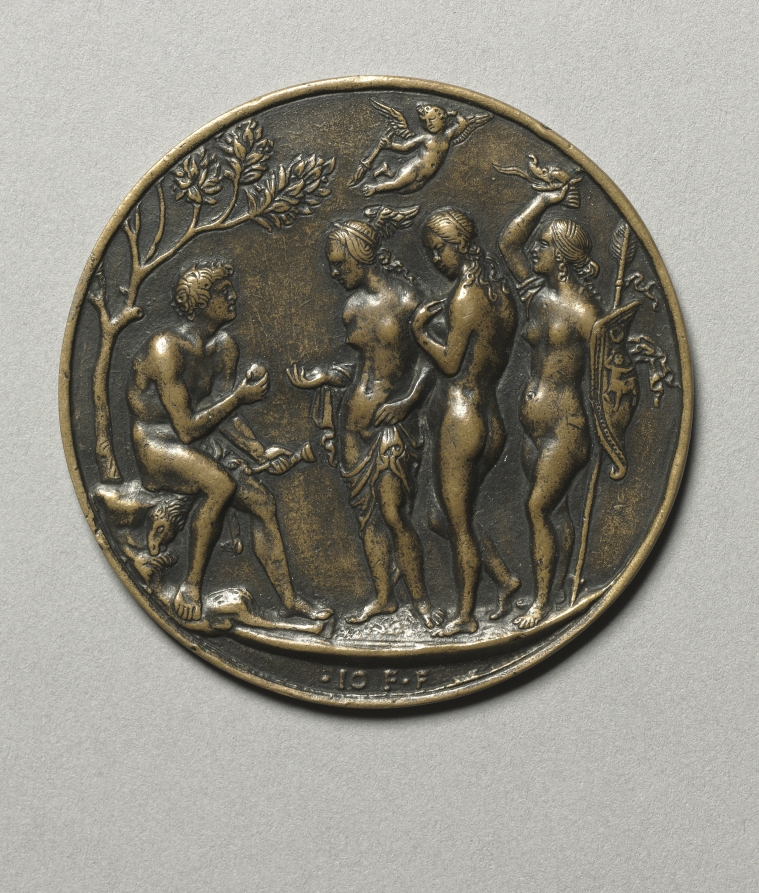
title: Judgment of Paris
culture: Italy, Padua, early 16th century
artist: Giovanni Paolo Fonduli (Italian)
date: c. 1505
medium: bronze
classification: Sculpture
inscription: inscribed at the bottom: IO F.F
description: Fonduli's relief depicts the ancient tale of the judgment of Paris, a mythological beauty contest for three Greek goddesses judged by the Trojan prince Paris. He holds an apple in his hand while Aphrodite, Hera, and Athena stand before him. Aphrodite extends a hand, signifying her attainment of the apple, and Athena holds the flaming head of a beast in the air, suggesting the imminent conflict of the Trojan War. In some versions of the story, only Aphrodite appears naked before Paris, but in Fonduli's work, Hera and Athena are completely nude, while Aphrodite ineffectually holds light drapery to shield her lower body. Fonduli blurs the identity of the three goddesses, showing that there is little difference in their respective beauty.